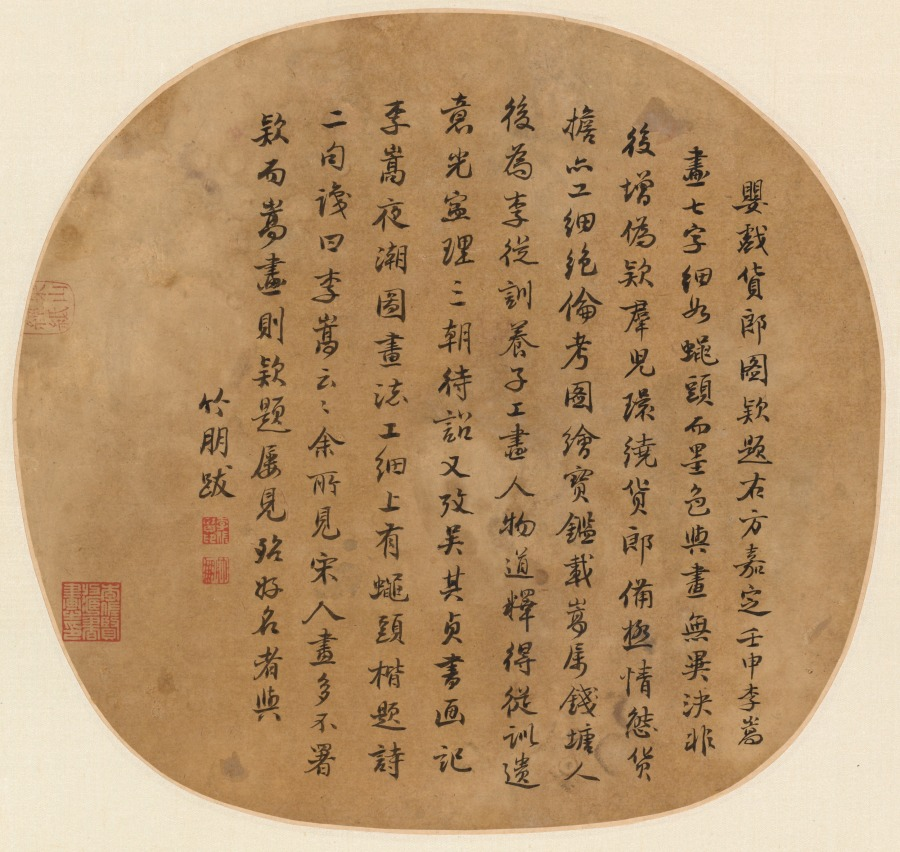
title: The Knickknack Peddler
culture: China, Southern Song dynasty (1127-1279)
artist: Li Song (Chinese, active c. 1190–c. 1230)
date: 1212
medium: Album leaf; ink and color on silk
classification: Painting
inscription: Artist's inscription: 嘉定壬申李嵩畫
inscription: 1 colophon and 4 seals: 1 colophon and 3 seals of Li Zuoxian 李佐賢 [1807–1876]; 1 seal unidentified.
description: The court artist Li Song from Hangzhou excelled in meticulous depictions of children, peddlers, and their various goods. Here, he captures a dramatic scene of children attacking a snake with a stick and stone. The peddler rushes toward the children, leaving his merchandise unattended. Painted during the reign of emperor Ningzong, the drama unfolding around vulnerable children may allude to Ningzong’s nine sons who died young, leaving him without a direct male descendant.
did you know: There is a skull, upside down, near the top of the left basket.